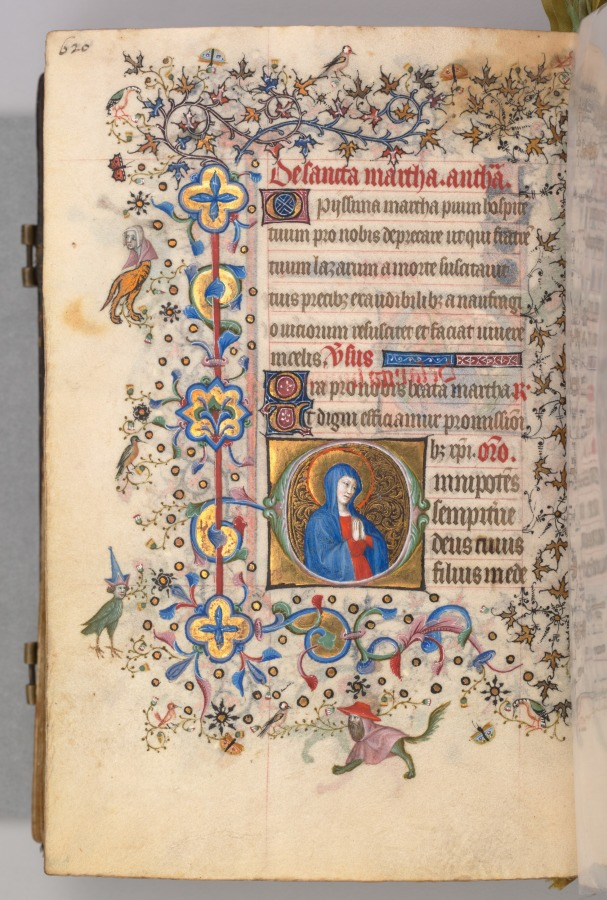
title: Hours of Charles the Noble, King of Navarre (1361-1425): fol. 304v, St. Martha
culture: France, Paris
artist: Master of the Brussels Initials and Associates (French)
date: c. 1405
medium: ink, tempera, and gold on vellum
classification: Bound Volume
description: This precious volume was obviously highly prized by its owner, the French-born King of Navarre, who had his coat of arms painted on no less than twenty folios. Rather than directly commissioning this manuscript from a specific workshop, it seems that Charles the Noble acquired his book of hours -- perhaps ready-made for the luxury market -- while on a trip to Paris in 1404-05. A collaborative effort, six painting styles are evidenced within the pages of this codex, those of two Italians, two Frenchmen, and two Netherlanders. The painter who was responsible for the planning and decoration of the book, and who produced seventeen of the large miniatures, was a Bolognese artist known as the Master of the Brussels Initials. His principal assistant, responsible for most of the borders, was a Florentine who signed his name "Zecho" da Firenze on folio 208 verso.